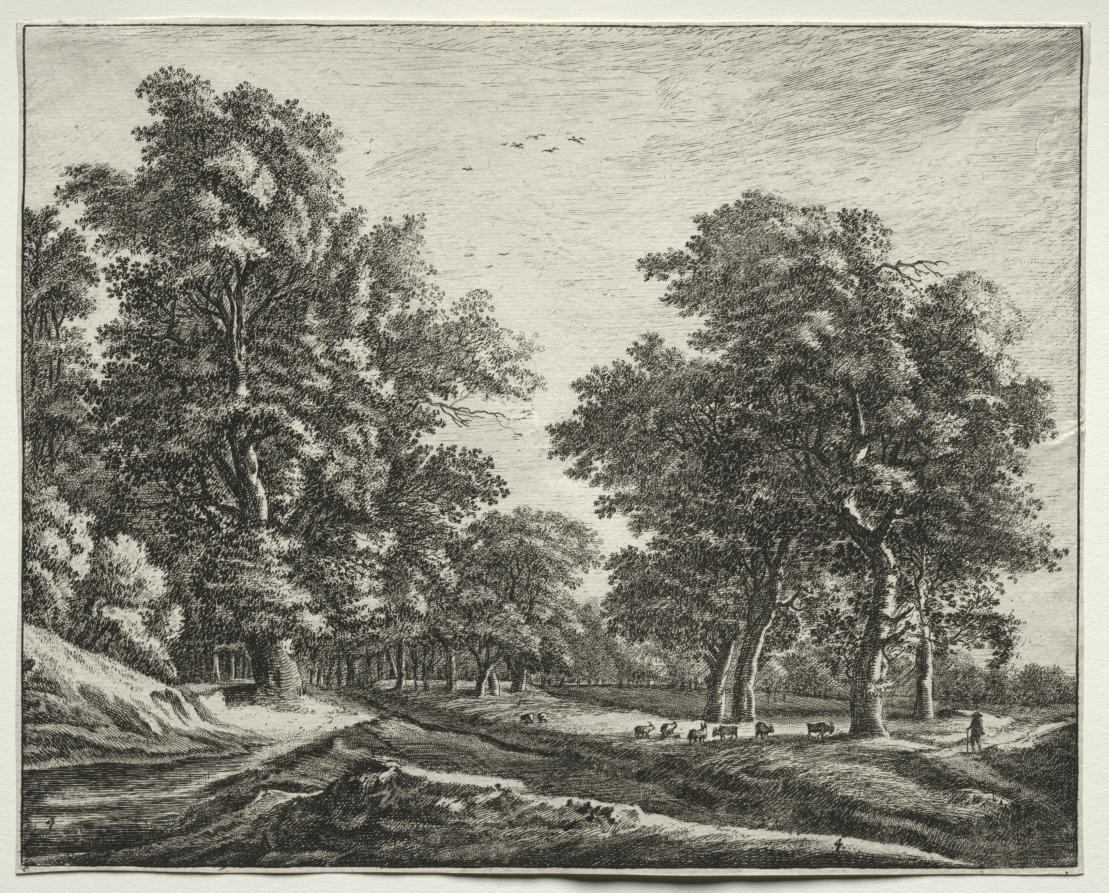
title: Six views in the Wood of the Hague: Plate 4, Goats Under the Trees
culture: Netherlands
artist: Roelant Roghman (Dutch, 1627–1692)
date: 1640–52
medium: etching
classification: Print